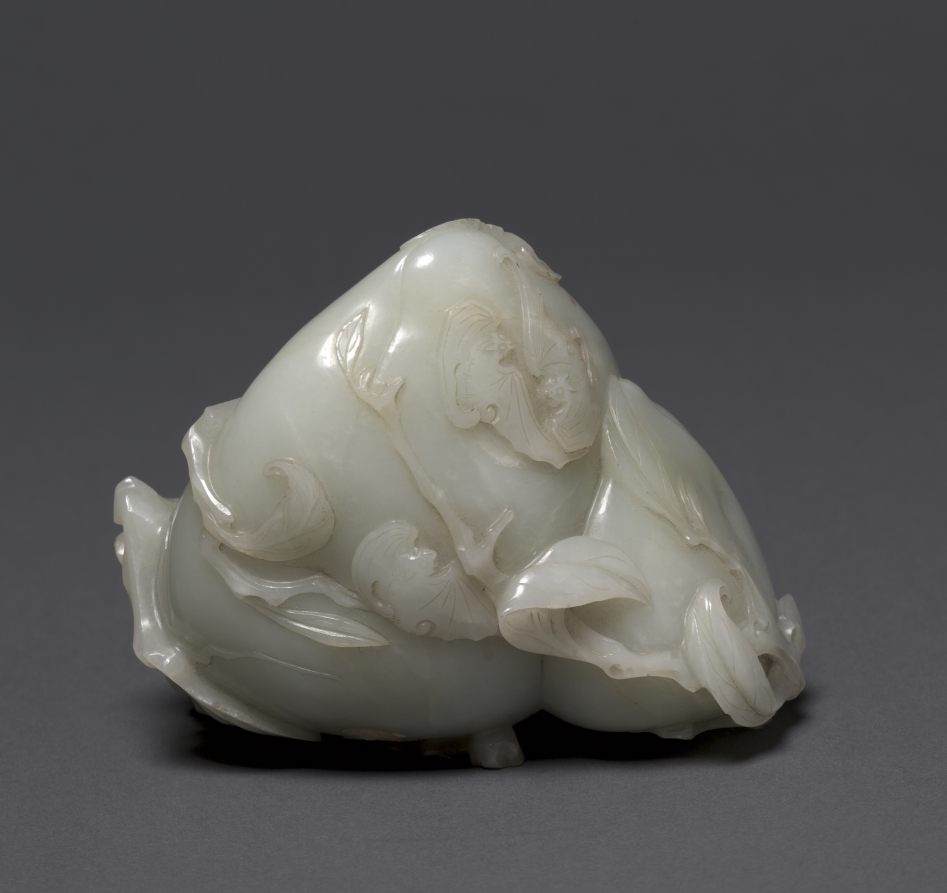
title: Peaches and Bats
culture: China, Qing dynasty (1644–1911)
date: late 1600s–1700s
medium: greenish-white jade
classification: Jade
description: This white jade is carved as a double peach with realistically detailed leaves and branch following the curve of the jade. Clinging to the edge are a pair of bats, which represent good fortune.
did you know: This jade sculpture was given to the museum in memory of John D. Rockefeller and his family.